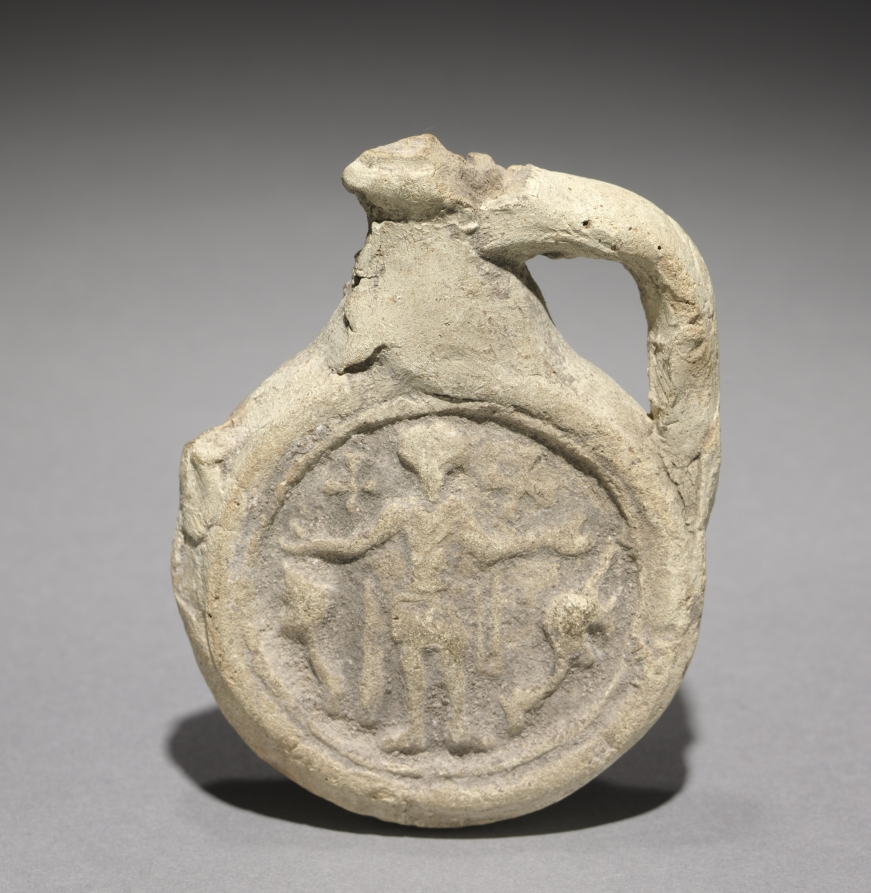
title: Pilgrim's Flask with Saint Menas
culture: Egypt, Coptic period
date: 400–600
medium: terracotta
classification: Ceramic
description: These flasks bear the image of Saint Menas, an early martyr of the Christian Church whose shrine was in the desert southwest of Alexandria in Egypt. These flasks were probably used by pilgrims to hold oil taken from the lamp that burned over this saint's tomb. Probably manufactured near the shrine, pilgrim's flasks often bear decorations hinting at their place of origin, as is the case here.